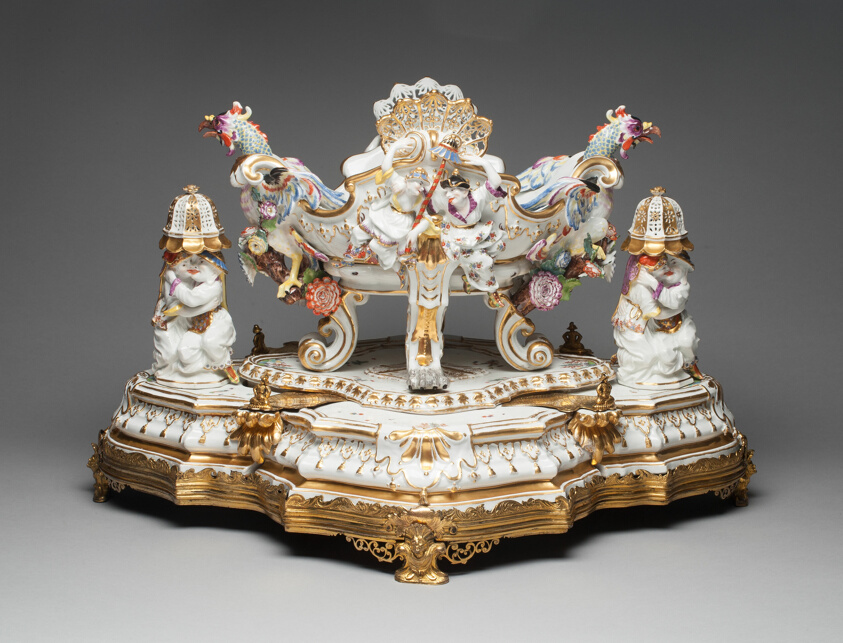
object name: Ceramics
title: Centerpiece and Stand with Pair of Sugar Casters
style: Rococo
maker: Meissen Porcelain Manufactory; Germany, founded 1710; Modeled by Johann Joachim Kändler; German, 1706-1775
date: 1737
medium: Hard-paste porcelain, polychrome enamels, gilding, and gilt bronze mounts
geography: Meissen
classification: tableware; ceramics; porcelain; european decorative arts